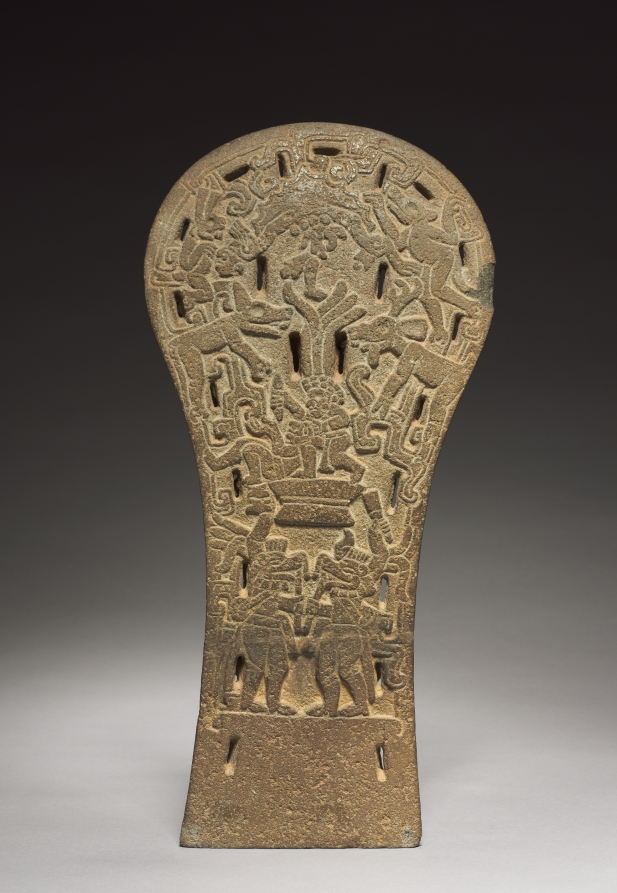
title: Ballgame Palma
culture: Mexico, Gulf Coast, Classic Veracruz style (600-1100)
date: c. 900–1100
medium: stone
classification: Sculpture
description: Stone palmas—so-called today for their palm frond-like shape—are ceremonial sculptures that may replicate lightweight gear worn over the chest during the ballgame. The scene on the back of this palma vividly illustrates the tie between the ballgame and sacrifice. A bat descends from the top, clutching severed human body parts, and at the center an upright figure brandishes a blade over a reclining victim. The scene's many animal figures, including the one on the front, may belong to ballgame mythology that now is lost.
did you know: The Mesoamerican ballgame was played with a hard rubber ball that players bounced off their hips.